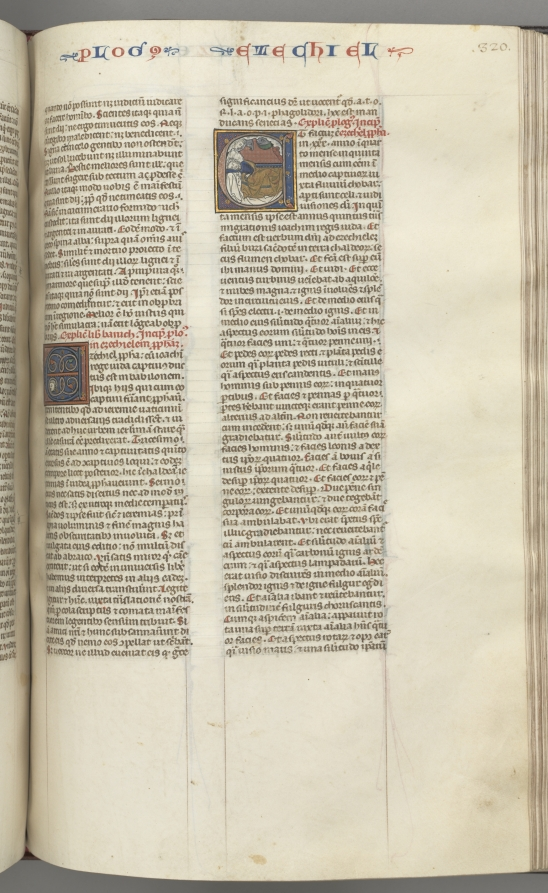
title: Fol. 320r, Ezechiel, historiated initial E, a sleeping Ezechiel with his vision of the four beasts above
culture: Southern France, Toulouse(?), 13th century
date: c. 1275–1300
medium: ink, tempera and gold on vellum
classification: Bound Volume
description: Biblical manuscripts were highly prized and important possessions of churches, monasteries, cathedral schools, and universities throughout medieval Europe. The biblical texts were known as the vulgate, the translations made by Saint Jerome in the fourth century from Hebrew and Greek into Latin, which became the definitive and official Latin version of the Roman Church. In the 13th century, the bible was, for the first time, produced as a single volume with an officially sanctioned sequence to its books and chapters as illustrated by this example. The very extensive decoration of this bible is arranged hierarchically to indicate the relative importance of the various texts so that full or almost full-page initials mark the openings of the first prologue, Genesis, and the first Gospel; historiated initials mark the beginning of each book and illuminated initials mark the Prologues.